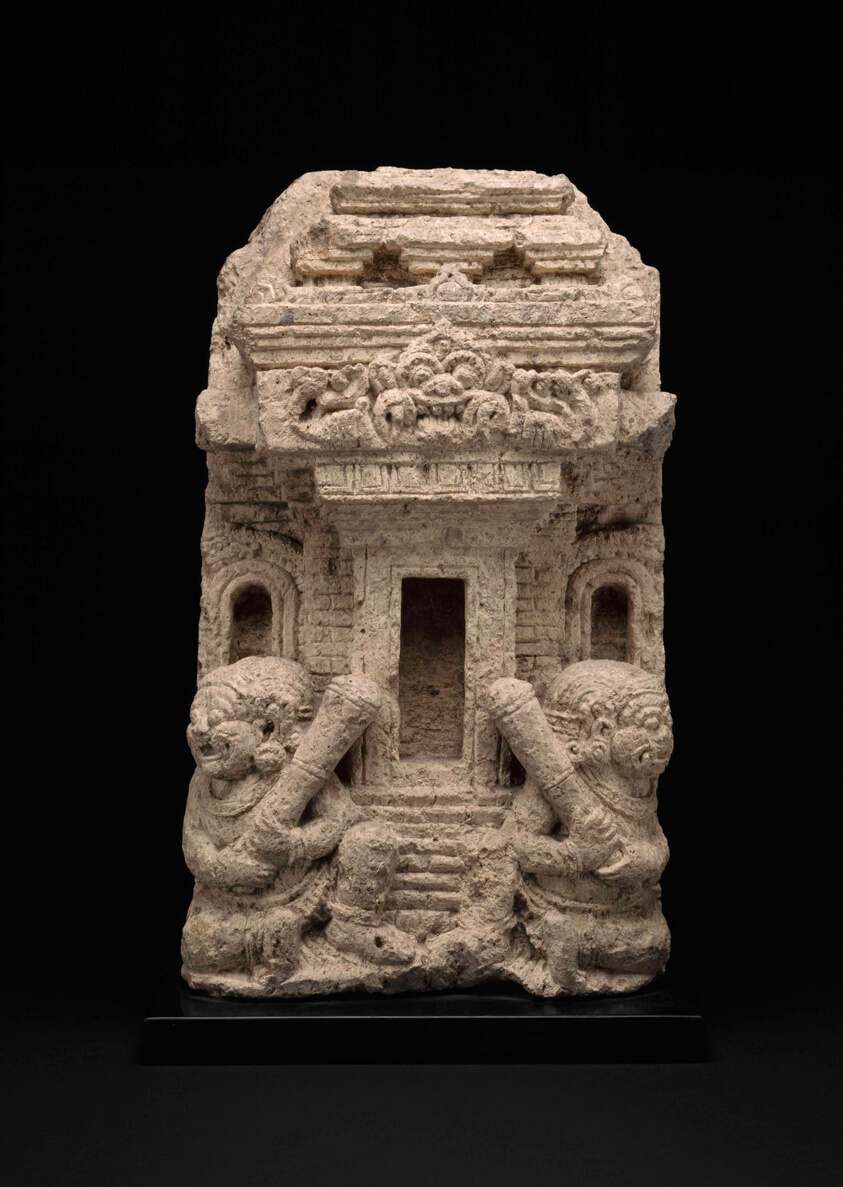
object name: Architectural fragment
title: Model of a Temple with Guardians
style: Southeast Asian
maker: Indonesia; Eastern Java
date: 14th/15th century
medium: Tuff stone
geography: Eastern Java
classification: sculpture; asian art; architectural fragment